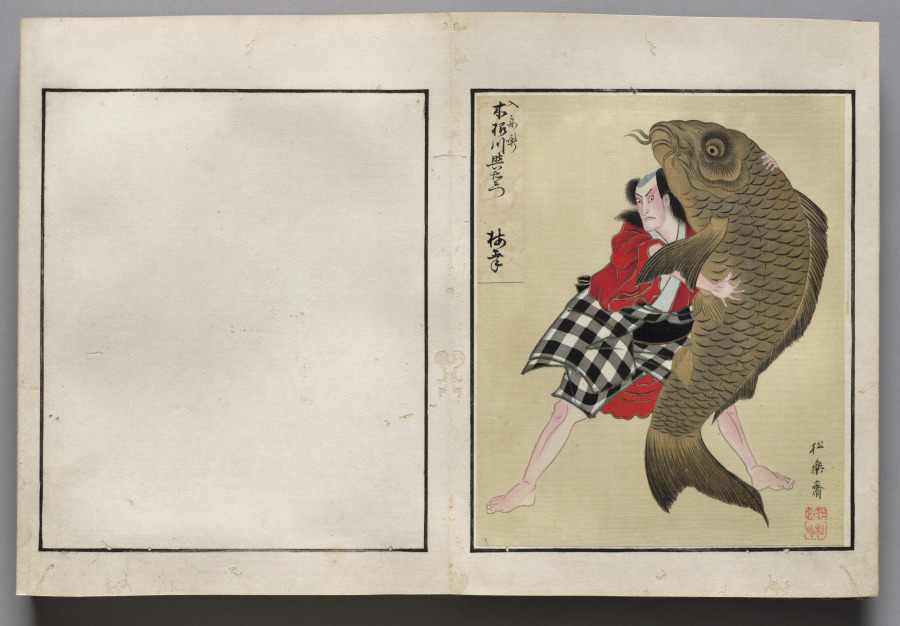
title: Double-Leaf from Album of Actor Portraits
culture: Japan, Edo period (1615–1868)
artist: Shōrakusai (Japanese)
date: c. 1790–1810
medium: double-leaf from an accordion-style album; ink and color on silk (right)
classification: Bound Volume